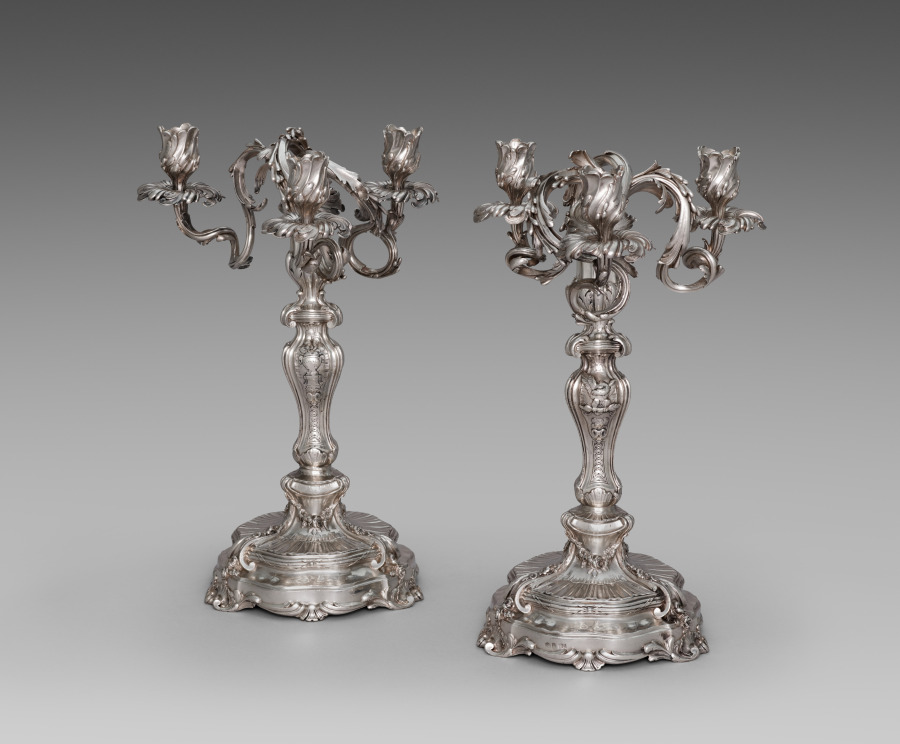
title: Candelabrum Pair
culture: France, Paris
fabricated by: François Thomas Germain (French, 1726–1791)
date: 1757–1758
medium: silver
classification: Silver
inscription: on base: Fait par F. T. Germain sculpr offre du roy aux galleries du Louvre a Paris 1758.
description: This pair of candelabras were one small part of the Parisian Service, an enormous silver dinner set commissioned by Empress Elisabeth of Russia. This revival of artistic relationships between France and Russia towards the end of her reign was connected to her policy of reconciliation with the French Royalty. Though Elisabeth died before seeing the complete service delivered from Paris to Saint Petersburg it continued to be used well into the reign of Catherine II.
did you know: These candelabra are part of a dinner service sent from Paris, France to Saint-Petersburg, Russia in two separate shipments, the first of which contained 270 objects for 8 dozen place settings.